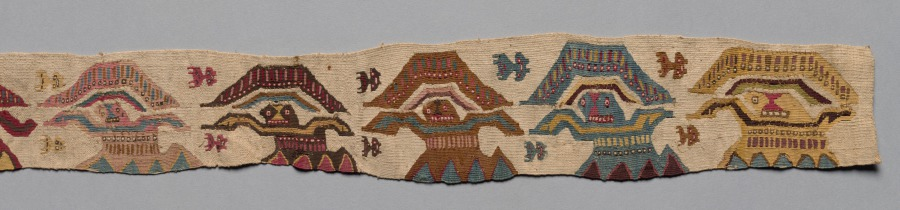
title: Lower Border of a Garment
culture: Central Andes, North Coast, Chimú or Lambayeque (Sican) People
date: 1000–1470s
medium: tapestry; wool and cotton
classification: Textile